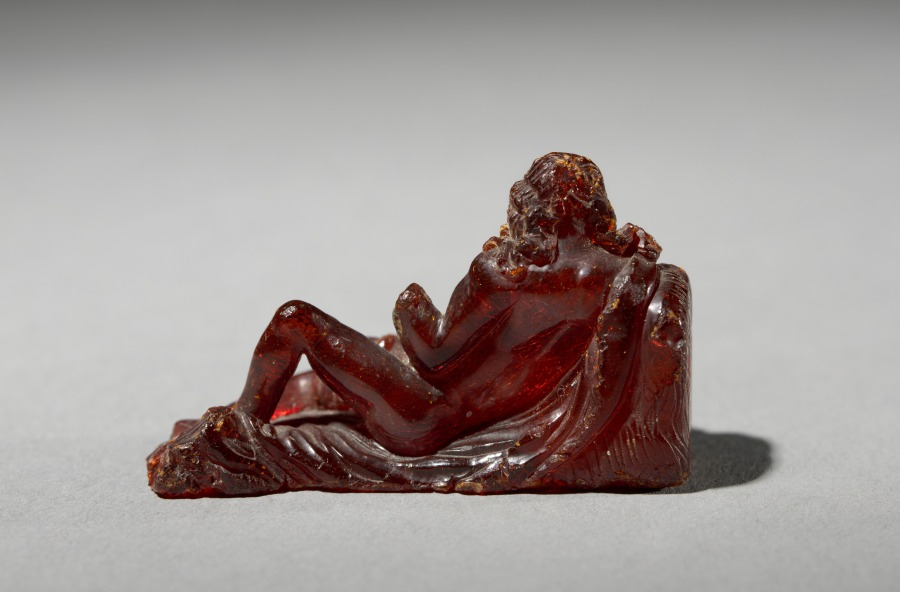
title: Statuette of a Reclining Woman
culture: Greek, Hellenistic, or Roman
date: c. 100 BCE–100 CE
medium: amber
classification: Sculpture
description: This tiny statuette is made from amber, or fossilized tree sap. A nude woman reclines against a rocky feature, surrounded by sumptuous piles of fabric which wind around her right arm and leg. Her gaze is upturned, loose hair framing her face. There are cracks throughout the figure, and she is missing both hands and some of her face. She may represent a nymph or maenad.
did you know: Amber can range in color from bright yellow to deep red depending on its origins.